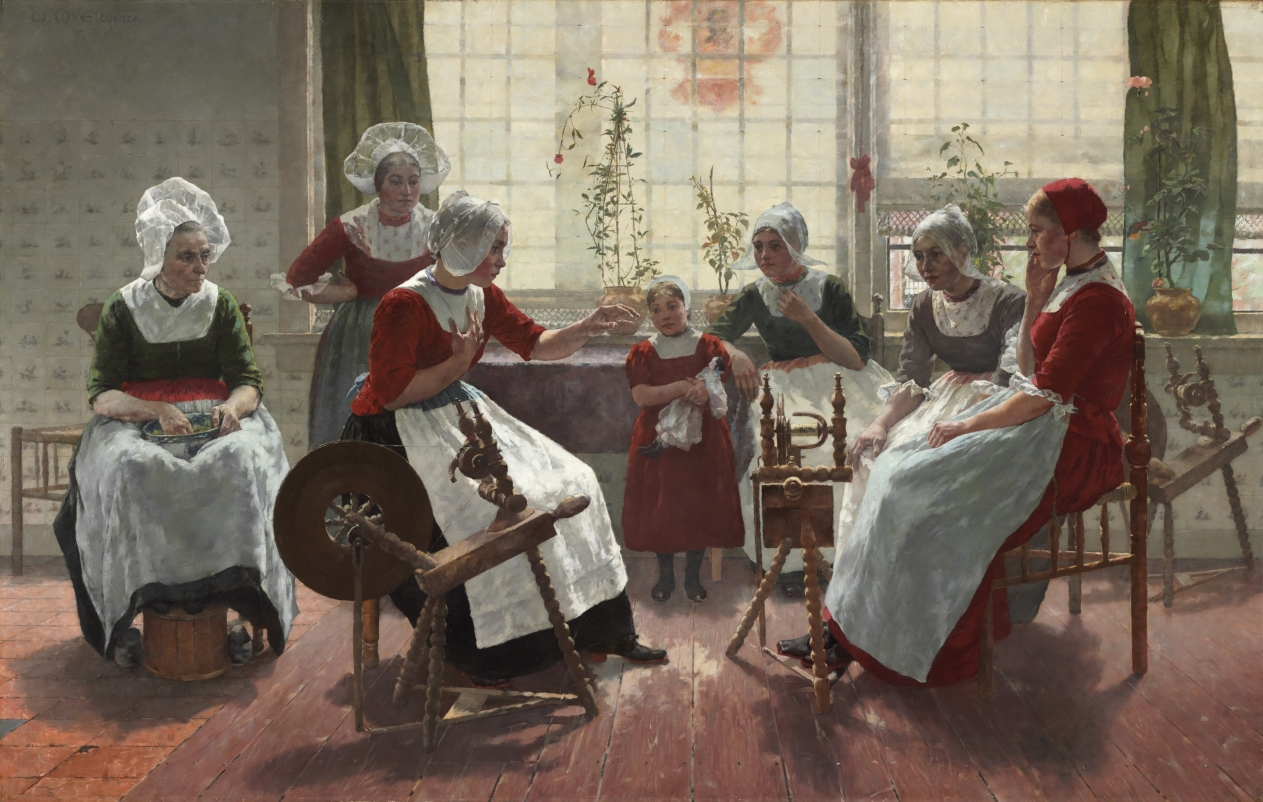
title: The Ghost Story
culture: America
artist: Walter MacEwen (American, 1860–1943)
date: 1887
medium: oil on canvas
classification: Painting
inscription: signed upper left: W. McEWEN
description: During the 1880s, the Netherlands became a magnet for several American artists, among them Walter MacEwen. His most famed painting, The Ghost Story, presents a group of individuals in a Dutch interior listening with rapt attention to spooky narration delivered by a woman at a spinning wheel. A young girl clutches her doll in fascination.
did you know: The women in this painting wear the traditional clothing of Volendam, a fishing village located in the province of North Holland.